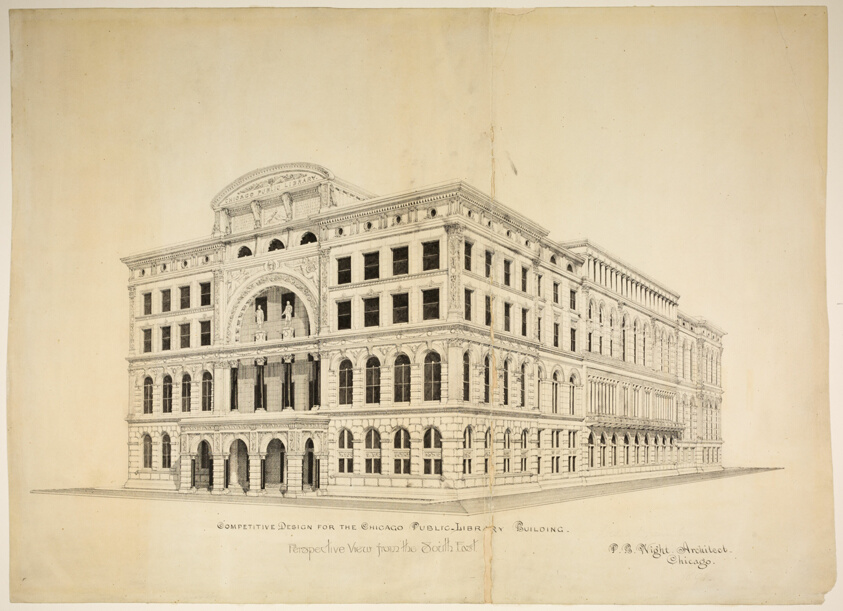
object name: Architectural Drawing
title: Chicago Public Library Design Competition, Chicago, Illinois, Perspective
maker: Peter Bonnett Wight (American, 1838–1925)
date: 1891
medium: Ink on paper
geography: Chicago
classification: presentation drawing; architectural drawing